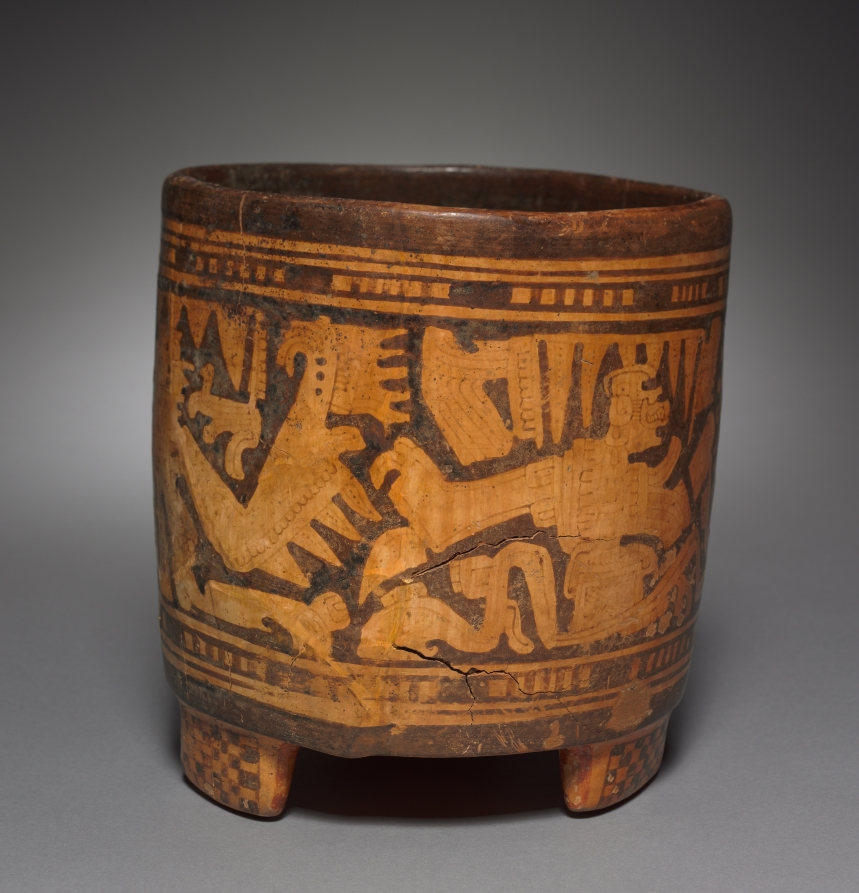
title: Vase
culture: Honduras, Maya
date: 250–900 CE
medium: earthenware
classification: Ceramic